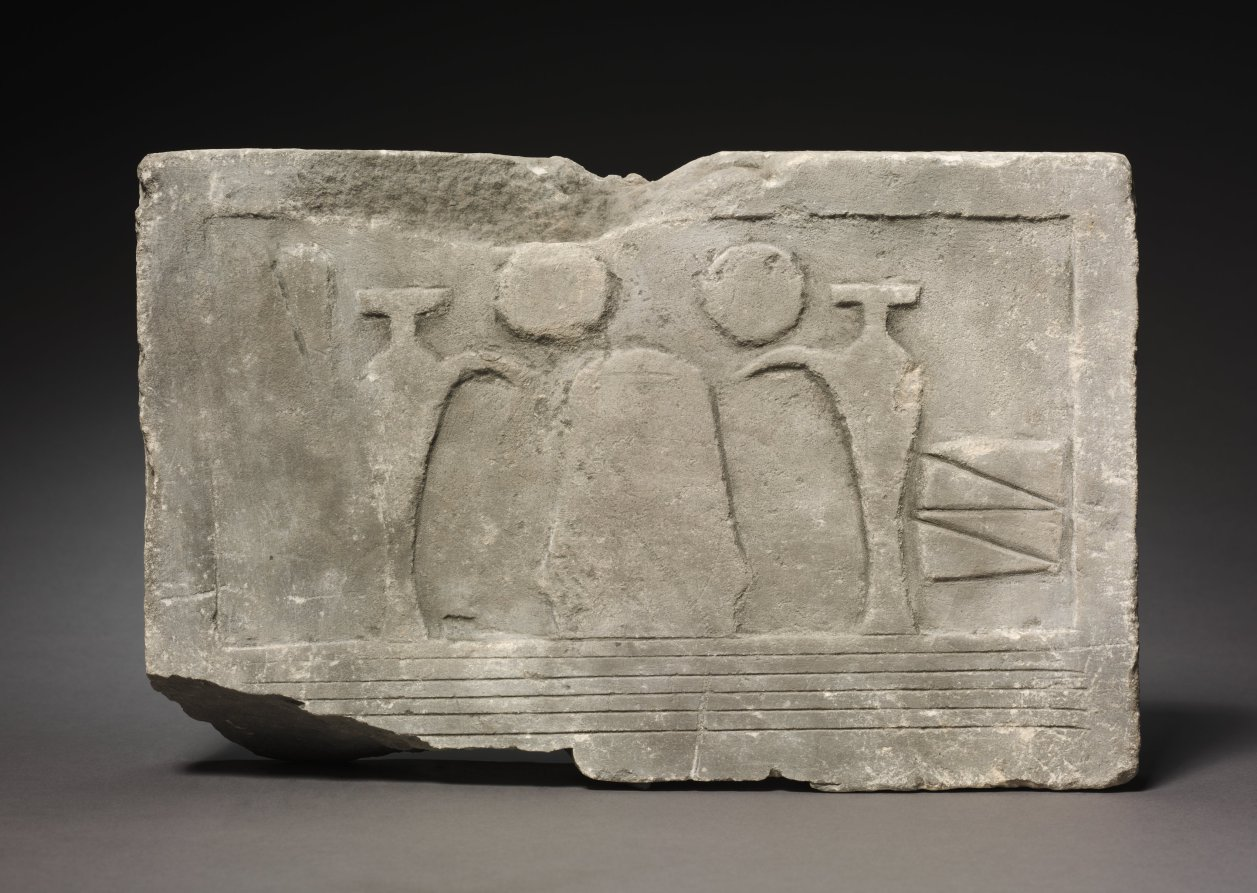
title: Offering Table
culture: Egypt, Middle Kingdom (2040–1648 BCE)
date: 2040–1648 BCE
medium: limestone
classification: Sculpture